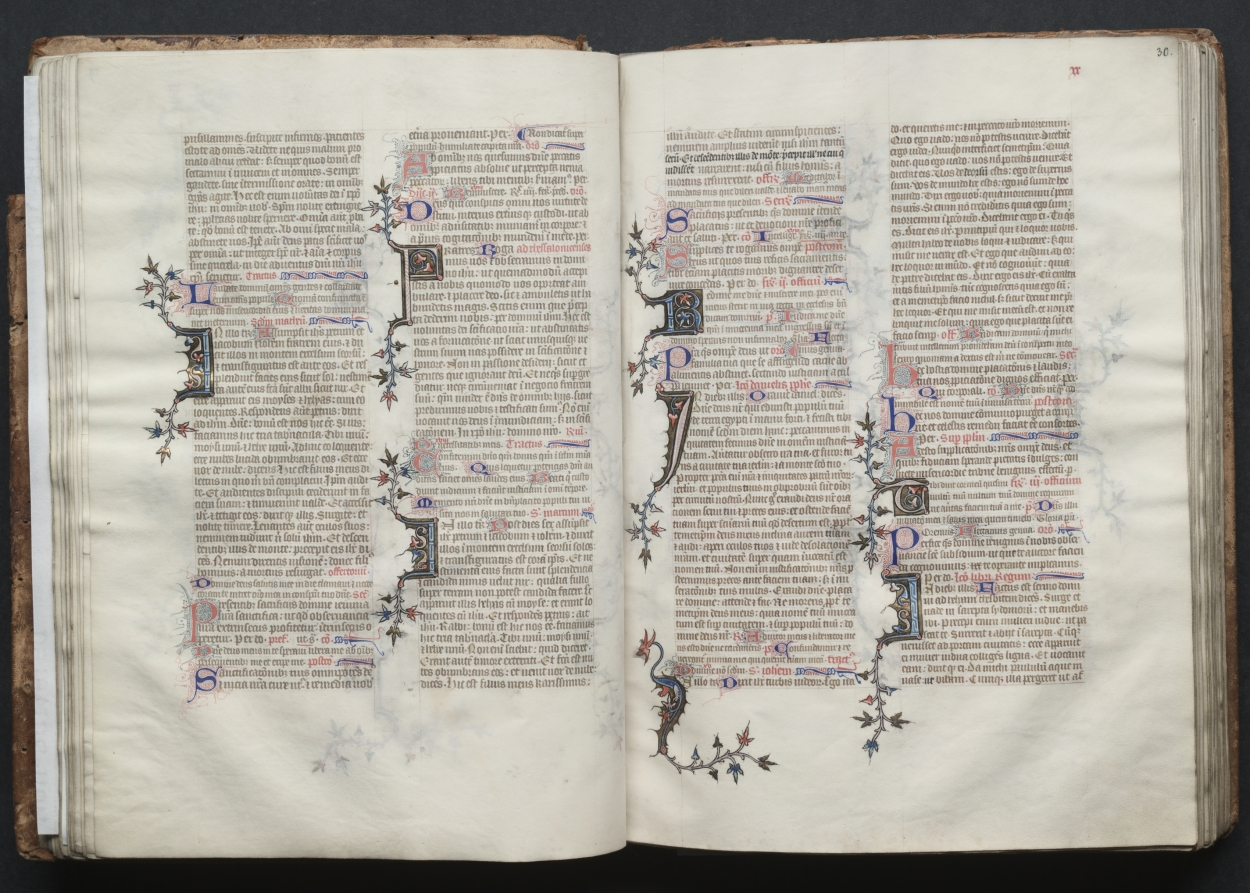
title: The Gotha Missal: Fol. 29v, Text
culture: France, Paris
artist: Master of the Boqueteaux (French)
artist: and Workshop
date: c. 1375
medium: ink, tempera, and gold on vellum; blind-tooled leather binding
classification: Bound Volume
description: The style and quality of this manuscript's decoration is typical of deluxe Parisian books made for aristocratic or royal patrons. Most of the book's decoration appears to be the work of the Master of the Boqueteaux, an artist active at the court of King Charles V (died 1380). His style was apparently shared by a number of book illuminators working in and around Paris. It is very possible that the Gotha Missal belonged to Charles V, but is not provable because the manuscript has no royal portraits and lacks a colophon. Given the book's magnificent decoration, however, it would seem that it was produced for a Valois prince, if not for the king himself. The manuscript receives its name from the German dukes of Gotha, its later owners.